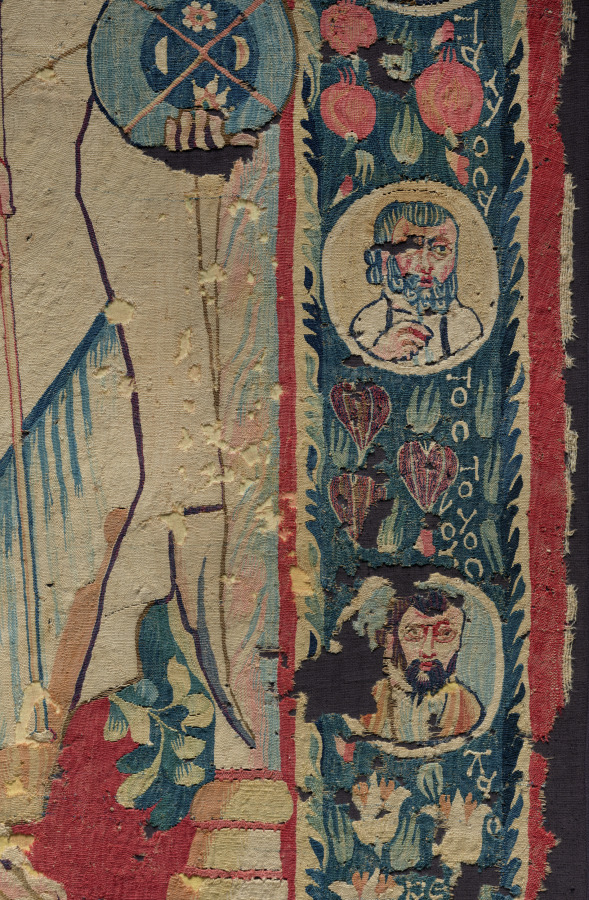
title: Icon of the Virgin and Child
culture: Egypt, Byzantine period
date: 500s CE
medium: wool and dye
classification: Textile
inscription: on the lintel of the architectural setting, the Greek inscription translates as: The Holy Michael, The Holy Mary, The Holy Gabriel. The wide foliate border is decorated with fruits and flowers and, in the lower part, with medallions containing the busts of apostles whose names are inscribed nearby in Greek and are translated as: Andrew, Matthew, Paul the Apostle, Luke, James, Phillip, Mark, Thomas, John, Matthias, Peter, and Bartholomew.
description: Woven from more than 20 colors of woolen thread, this rare tapestry was more expensive than a painting when it was made. The historical price reflected contemporary viewers’ appreciation for the skilled color blending by the weavers. Hung on a wall, this tapestry allowed viewers to venerate (honor) the Virgin Mary and the Christ Child in the Christian Orthodox church. Angels and apostles surround them, their names written in Greek. To be spiritually effective, an icon (devotional image) should follow its subject’s established visual tradition as closely as possible.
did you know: Created in Egypt's hot and dry desert climate, this tapestry features a border of lush greenery and fruits, while flowers peek out from around the throne of the Virgin. Imagine encountering this artistic oasis in a Coptic church during the dry heat of the day.